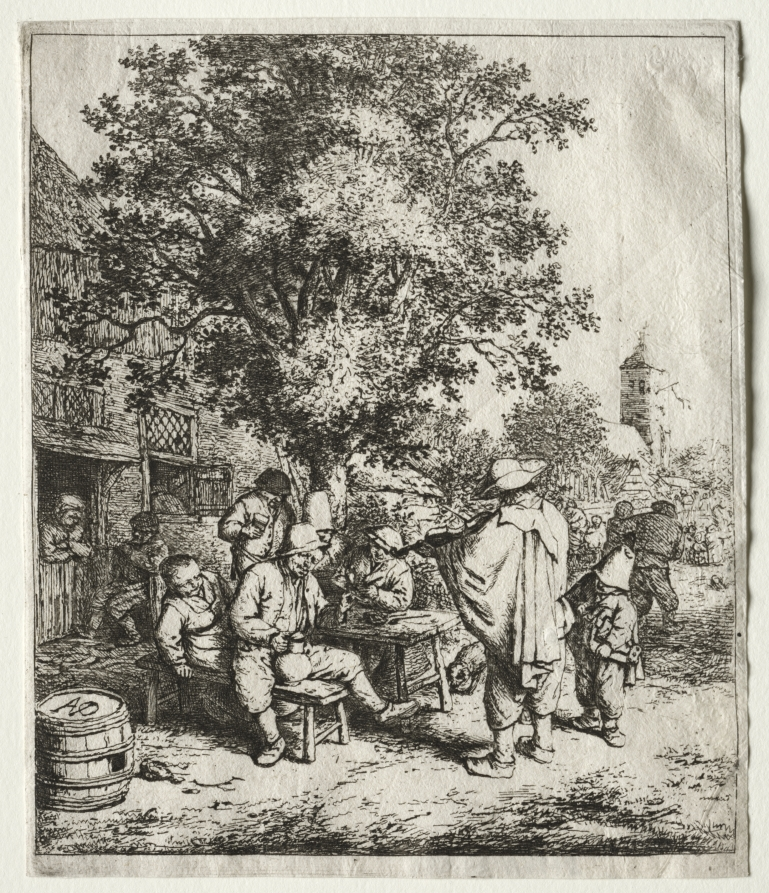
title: The fiddler and the hurdy-gurdy boy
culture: Netherlands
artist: Adriaen van Ostade (Dutch, 1610–1684)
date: c. 1654–56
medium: etching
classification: Print